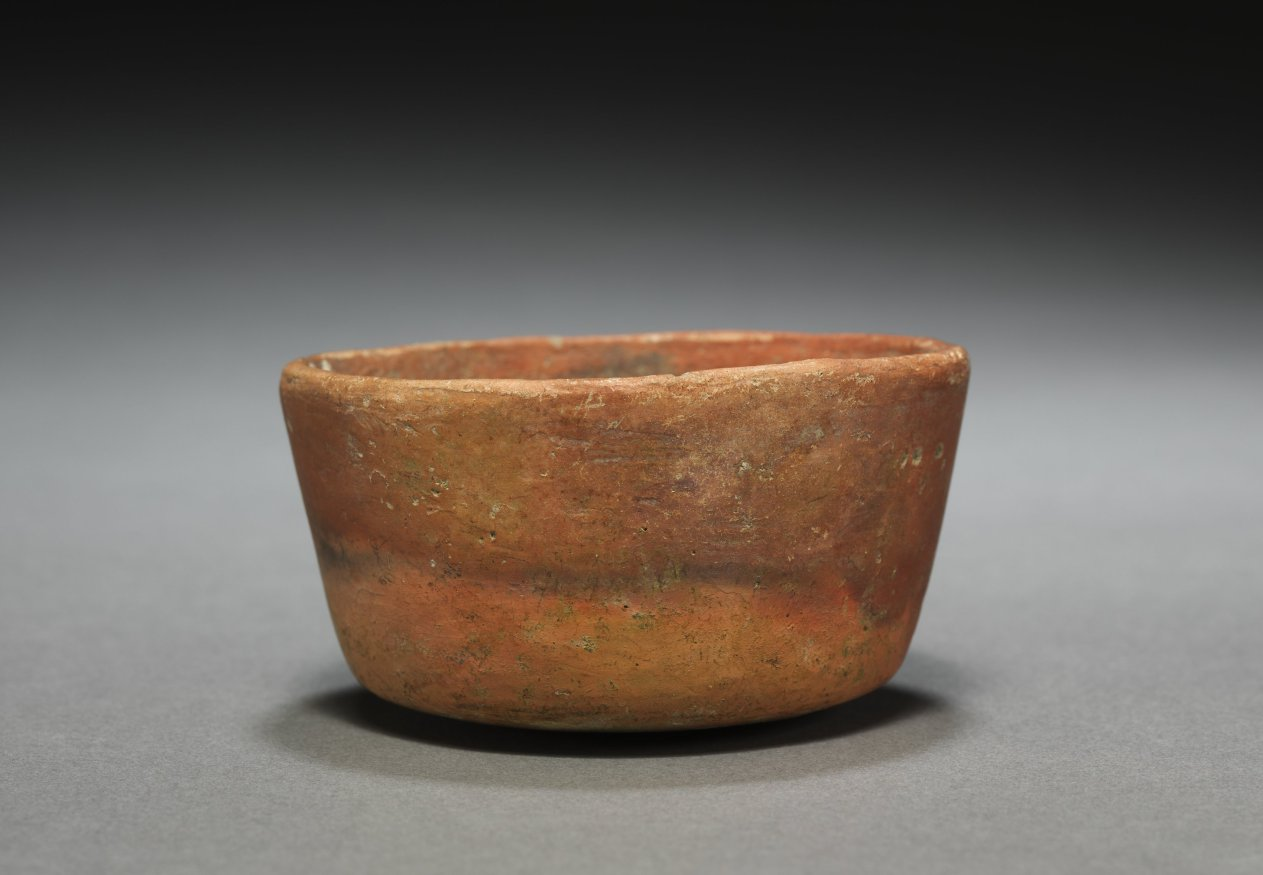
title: Cup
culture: Iran, Luristan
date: 3000–2000 BCE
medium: earthenware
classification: Ceramic